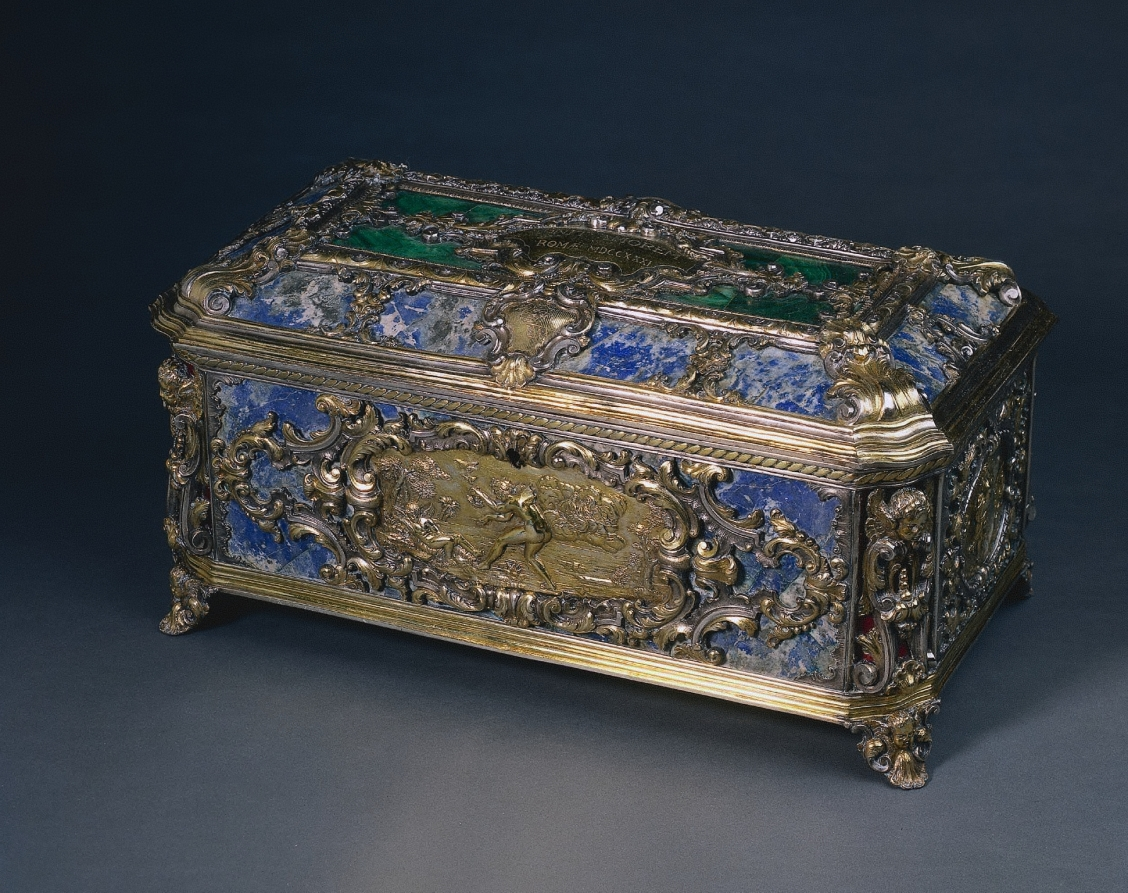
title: Boncompagni-Ludovisi-Ottoboni Marriage Casket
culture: Italy, Rome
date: 1731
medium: silver, partially gilt, malachite, lapis lazuli, enamel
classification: Silver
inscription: engraved arms of Boncompagni-Ludovisi and Boncompagni-Ludovisi-Ottoboni families. (Probably made in honor of wedding of Maria Francesca Ottoboni and Pier Gregorio Boncompagni-Ludovisi.) Inscribed on the lid's central cartouche: AMOR / GIGNIT AMOREM / ROMAE MDCCXXXI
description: The giving of coins or other valuable items was a powerful symbol of engagement and marriage in Europe in the 1600s and 1700s. Often these valuables were presented and kept in elaborate caskets that remained the property of the wife throughout the marriage, to be drawn upon in time of need, or as a symbol of their wealth and prosperity. This silver and hardstone casket was the gift of Pier Gregorio Boncompagni Ludovisi upon his marriage to Francesca Ottoboni in 1731. Their marriage represented the merger of two very powerful Italian noble families—the Boncompagni Ludovisi from Bologna and the Ottoboni from Venice. Both families had settled in Rome in the 17th century, and each were closely aligned with the papacy, having produced numerous cardinals and popes. Appropriately adorned with scenes from the myth of Cupid and Psyche, in which the two lovers work to overcome obstacles to their marriage, the casket is a masterwork of Roman silversmithing in the Baroque taste prevalent at that time throughout Europe.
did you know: The Latin inscription on this marriage casket, "amor gignit amorem," means "love begets love," an appropriate prediction for an impending union.